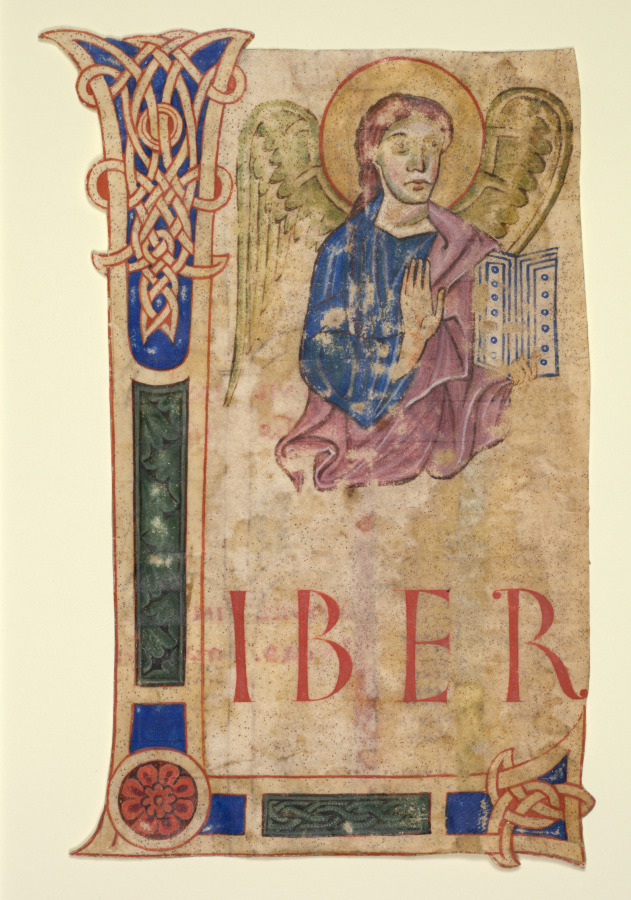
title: Miniature Excised from a Gospel Book: The Symbol of St. Matthew (recto) and Canon Tables (verso)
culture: Italy, Florence, 12th century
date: c. 1125–1150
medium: ink and tempera on vellum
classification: Manuscript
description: This initial L, for Liber generationis... (The book of the generation of Jesus Christ...), originally served as an introduction to the Gospel of St. Matthew. Unlike the Helmarshausen illuminator, who painted an actual portrait bust of St. Matthew (displayed nearby), this artist chose to paint within the letter the Evangelist's symbol, a winged man holding a book.